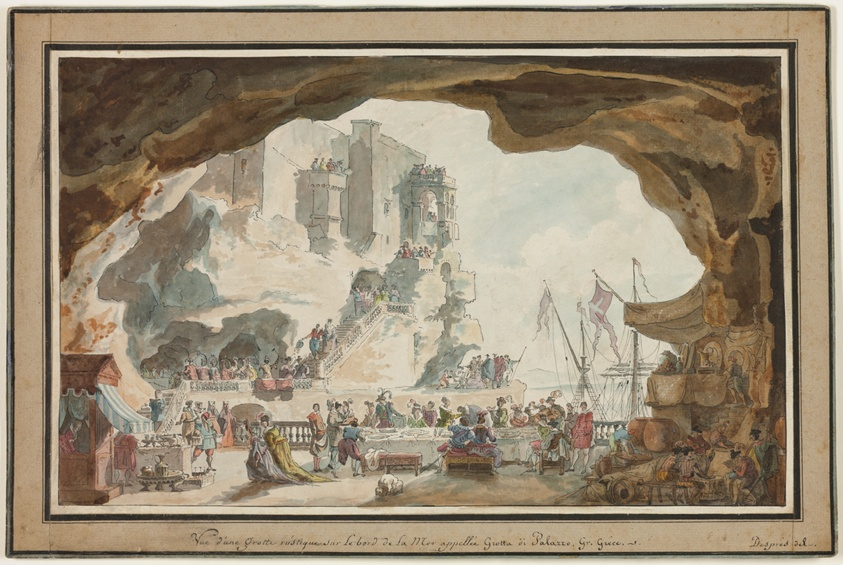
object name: Drawing and Watercolor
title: View of the Grotta di Palazzo with Banquet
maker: Louis Jean Desprez (French, 1743-1804)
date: c. 1790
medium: Pen and black ink and brush and watercolor, over traces of graphite, on ivory laid paper, laid down on card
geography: France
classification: watercolor; drawings (visual works); prints and drawing